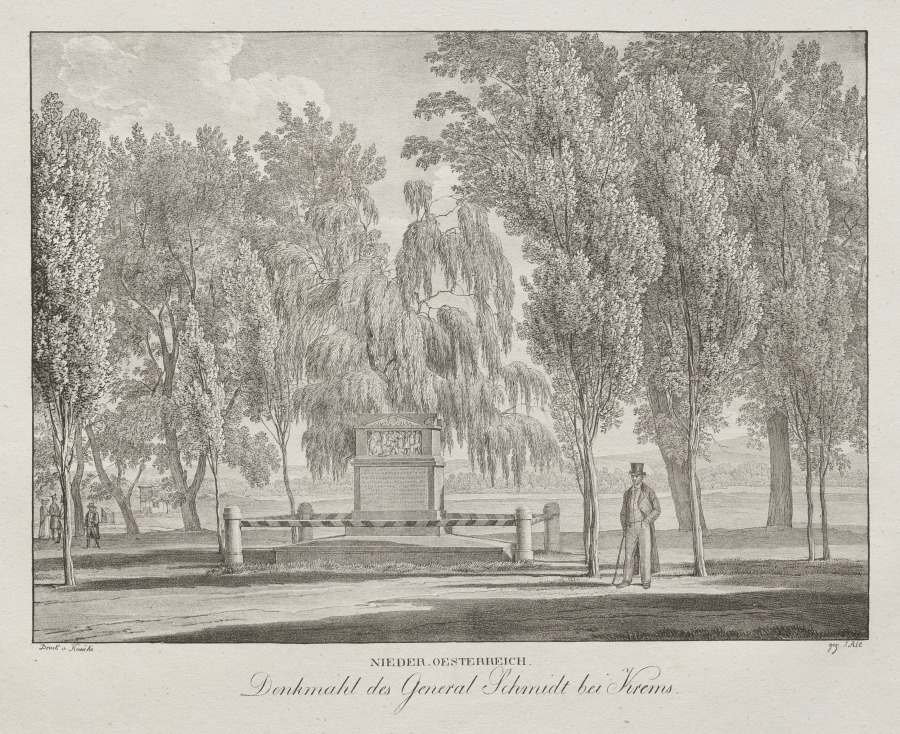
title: Nieder-oesterreich, Dankmahl des General Schmidt bei Krems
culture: Austria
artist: Jakob Alt (Austrian, 1789–1872)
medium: lithograph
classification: Print